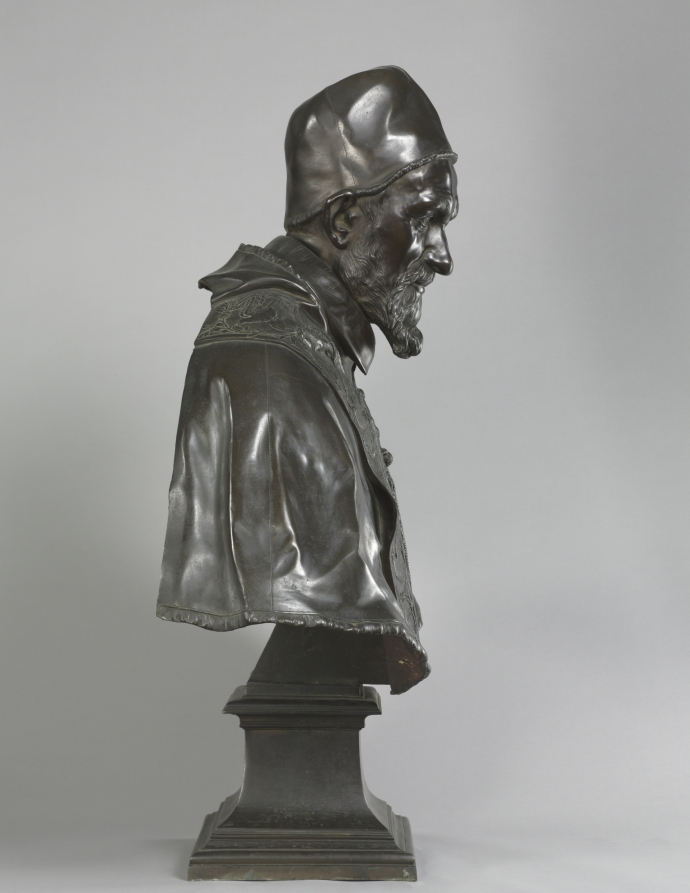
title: Portrait of Pope Innocent X Pamphili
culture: Italy, 17th century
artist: Alessandro Algardi (Italian, 1598–1654)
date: designed 1647–48; cast 1650–1700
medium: bronze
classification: Sculpture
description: Innocent X (Giovanni Battista Pamphili) was pope from 1644 until his death in 1655. Although he was not very interested in the visual arts, he followed tradition and gave several papal commissions for artistic projects. Algardi was the sculptor most frequently called upon by Innocent X. This sensitive portrait captures many details of the pope's costume as well as his intelligent, quiet face.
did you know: The pope's stole features Pamphili family emblems: fleur-de-lis and doves encircled by olive leaves.